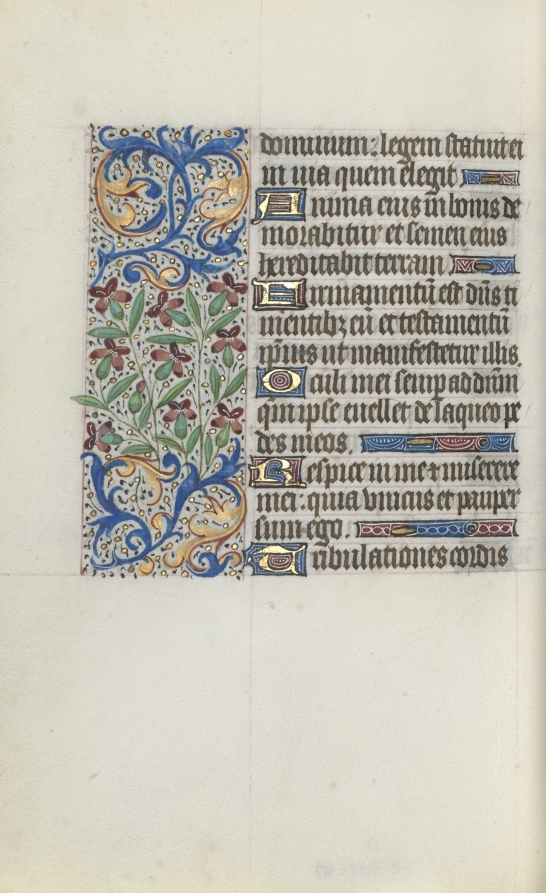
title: Book of Hours (Use of Rouen): fol. 119v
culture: France, Rouen, 15th century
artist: Master of the Geneva Latini (French, active Rouen, 1460–80)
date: c. 1470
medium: ink, tempera, and gold on vellum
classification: Bound Volume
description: In the late 1400s and early 1500s Rouen was an established and important center of book production. The city’s cathedral had a wealthy chapter that spent large sums of money to commission books and to maintain its extensive library. The stationers and booksellers would have likely been concentrated in or near the cathedral precinct. This artist, named after a manuscript now in Geneva, was Rouen’s principal illuminator during the second half of the 1400s.